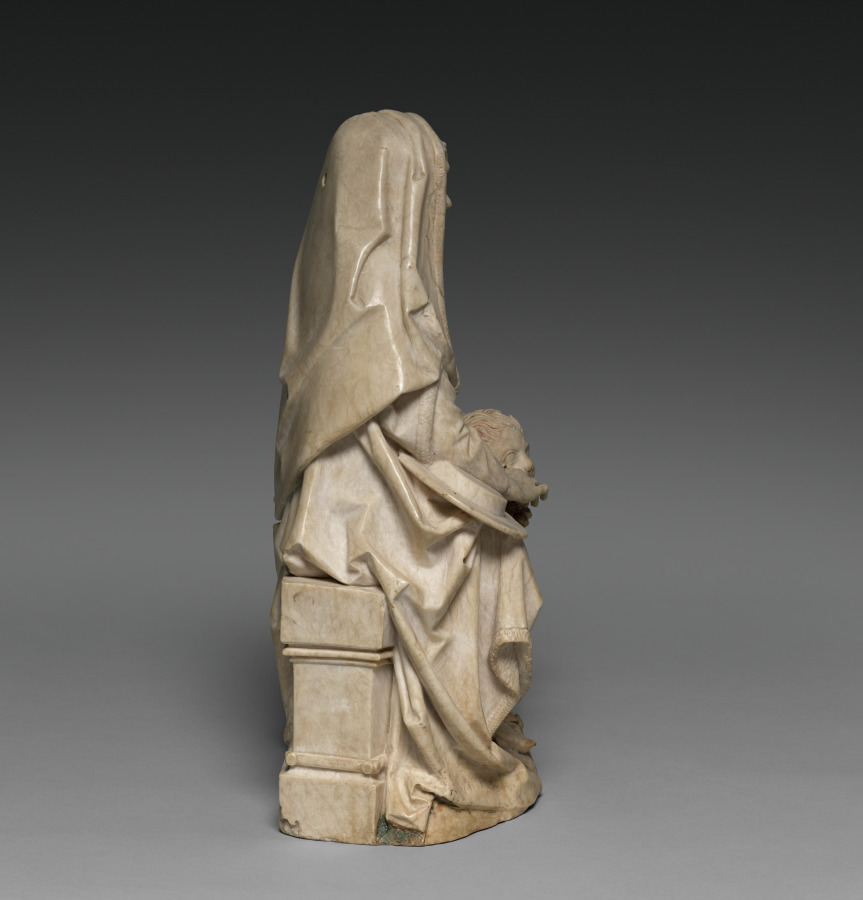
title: Saint Jerome and the Lion (From the former Church of St. Peter in Erfurt)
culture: Germany, Würzburg, late 15th Century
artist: Tilman Riemenschneider (German, active Würzburg, c. 1460–1531)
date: c. 1495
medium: alabaster, traces of polychromy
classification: Sculpture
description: According to legend, Saint Jerome (347–420 bce) lived in the desert, where he removed a thorn from an injured lion. Jerome is venerated in the Catholic Church as a Church Father, an important early author of Christianity. Here, he wears cardinal’s clothing from around 1500. Tilman Riemenschneider focused on Jerome’s relationship with the lion, creating empathy for the wounded animal. The delicacy of the depiction, which may have been partially painted to add highlights, is typical of alabaster, as is its fine polishing. The cord of the cardinal’s hat, missing today, may have been supplemented from another material.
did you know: In the story Saint Jerome encounters a fearsome lion, here depicted as diminutive, gentle, and submissive.